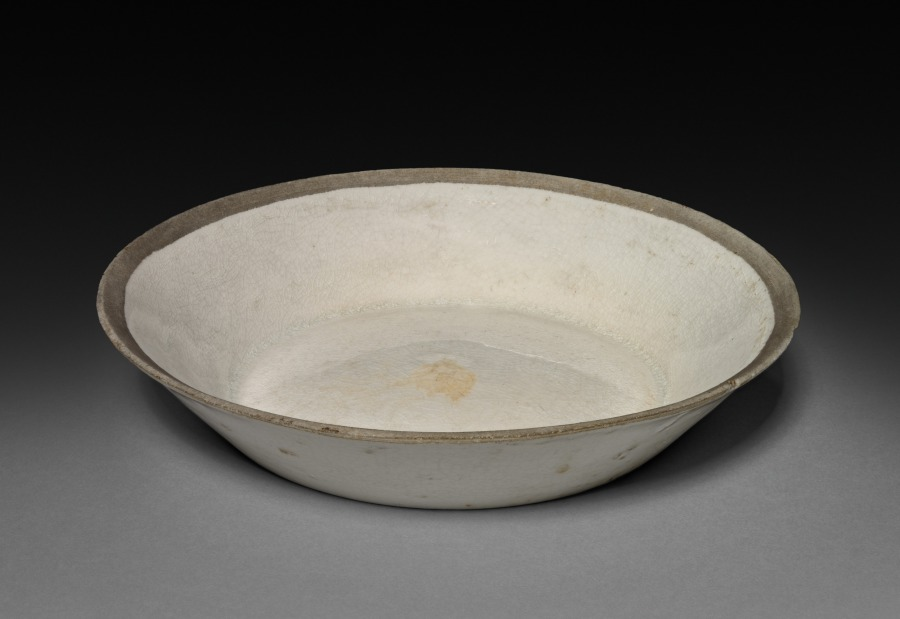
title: Saucer: Ding ware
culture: China, Jin dynasty (1115-1234) - Yuan dynasty (1271-1368)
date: 1100s-1200s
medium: porcelain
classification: Ceramic